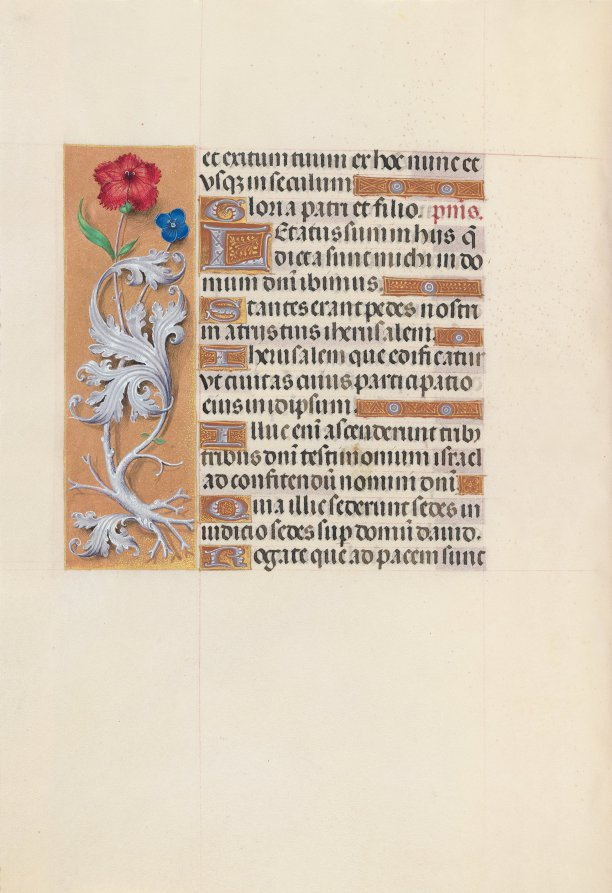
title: Hours of Queen Isabella the Catholic, Queen of Spain: Fol. 133v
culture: Flanders, Ghent and Bruges, late 15th century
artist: Master of the First Prayerbook of Maximillian (Flemish, c. 1444–1519)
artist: and Associates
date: c. 1500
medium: ink, tempera, and gold on vellum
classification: Bound Volume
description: This manuscript was illuminated by a circle of at least five highly organized manuscript painters active in the Flemish cities of Ghent and Bruges. The principal illuminator was Alexander Bening, who painted the majority of the book's miniatures. Manuscripts produced by this circle of artists are renowned for the decoration of their borders, which typically feature a rich variety of realistically-painted flowers, birds, and butterflies. This prayer book, called a book of hours, was intended not for a cleric, but for the private devotions of a lay person-in this case, Isabella the Catholic, Queen of Spain (1451-1504). Isabella's coat of arms embellishes the book's frontispiece. It is unlikely that the book was commissioned by the Queen herself; rather, she probably received it as a diplomatic gift from someone courting her patronage, perhaps Cardinal Francisco Jimenez de Cisneros. A Franciscan friar, Jimenez was dependent upon Isabella for his advancement, first to the post of Queen's confessor in 1492, and then to Archbishop of Toledo in 1495.